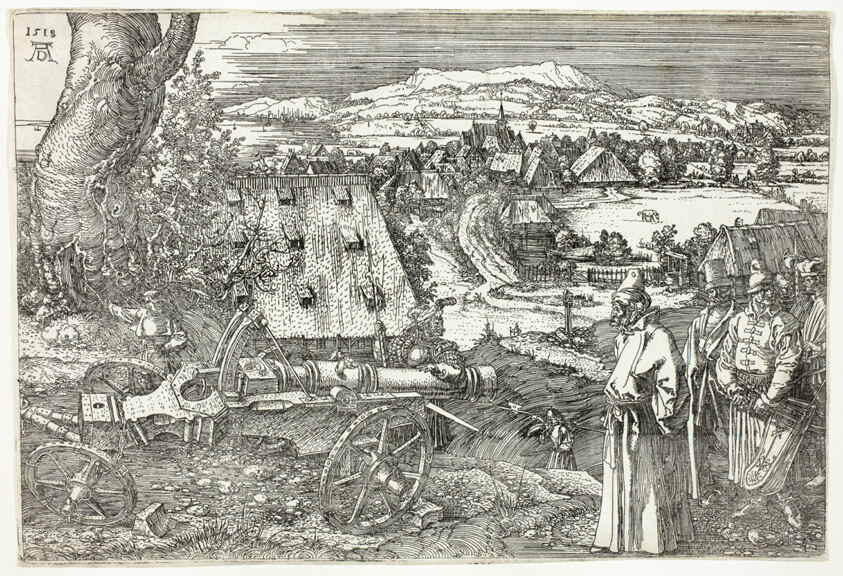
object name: Print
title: Landscape with Cannon (The Great Cannon)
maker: Albrecht Dürer (German, 1471-1528)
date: 1518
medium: Etching in black on ivory laid paper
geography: Germany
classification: etching; print; prints and drawing; paper